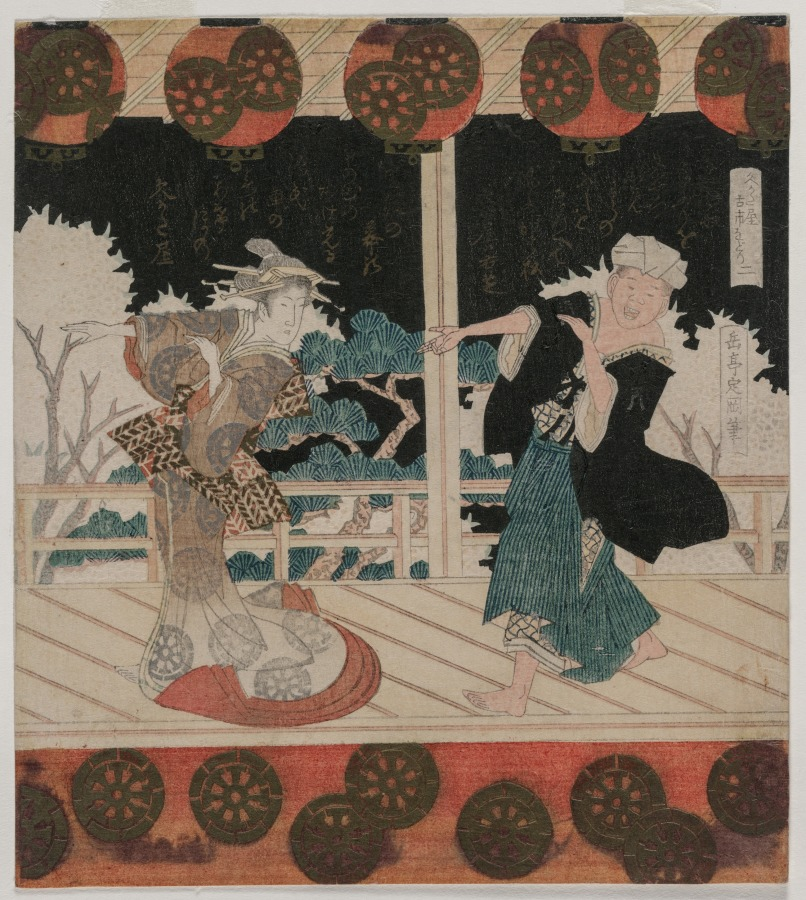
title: Furuichi Dance at the Hisagataya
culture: Japan, Edo period (1615–1868)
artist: Gakutei Harunobu (Japanese, 1786(?)–1868)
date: mid 1820s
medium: second of a pentaptych of woodblock prints; ink and color on paper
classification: Print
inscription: Signature: Gakutei Sadaoka hitsu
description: A surimono is a print in which an image is combined with poetry to celebrate a special event. This print shows the poet Hisagataya dancing with a troupe of geisha at a teahouse in the town of Furuichi near Ise.